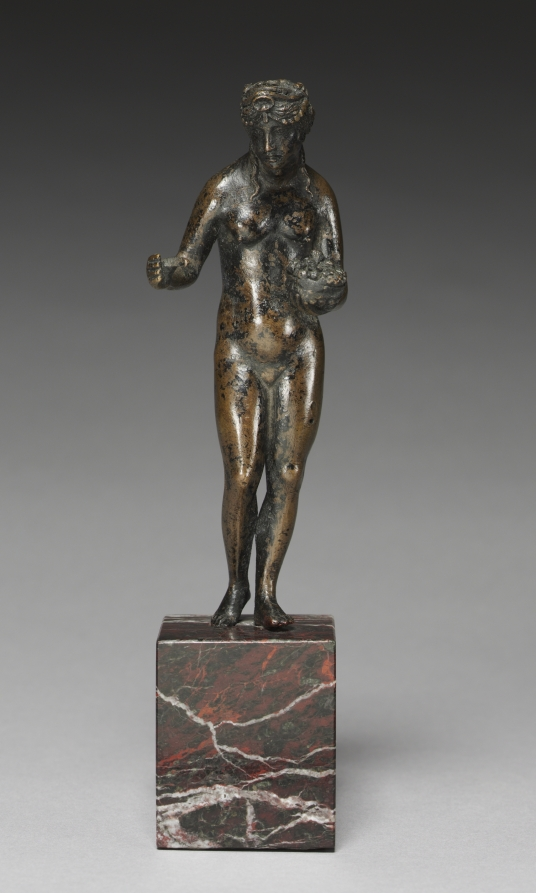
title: Pomona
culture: Italy, early 16th Century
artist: circle of Andrea Riccio (Italian, c. 1470–1532)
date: c. 1500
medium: bronze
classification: Sculpture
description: According to Roman mythology, the nymph Pomona cared for the gardens and forests, rejecting the pursuits of her suitors. The god Vertumnus fell in love with her. He disguised himself as an old woman, complimented her orchard and kissed Pomona passionately. As an old woman, Vertumnus explained that there was one person who loved both Pomona and her garden. Vertumnus then revealed himself to her, and from then on the two cared for Pomona's gardens together. Classicizing in style, Pomona stands nude with her weight on her left leg. She holds a bowl of fruit in her left hand while her right hand is clenched, suggesting it may have once held another object. Pomona wears a diadem, or headband, and hair decorated with a beaded garland falls in two locks over her shoulders. A hole has been drilled at the top of the figure's head for removal of the core and casting pins appear in the back of the right shoulder and on the front of the left leg. Other examples of this statuette exist in Oxford, Paris, Berlin and Washington. Only the Washington and Cleveland versions have been attributed to Riccio because of their superior quality of casting and the rich patinas.